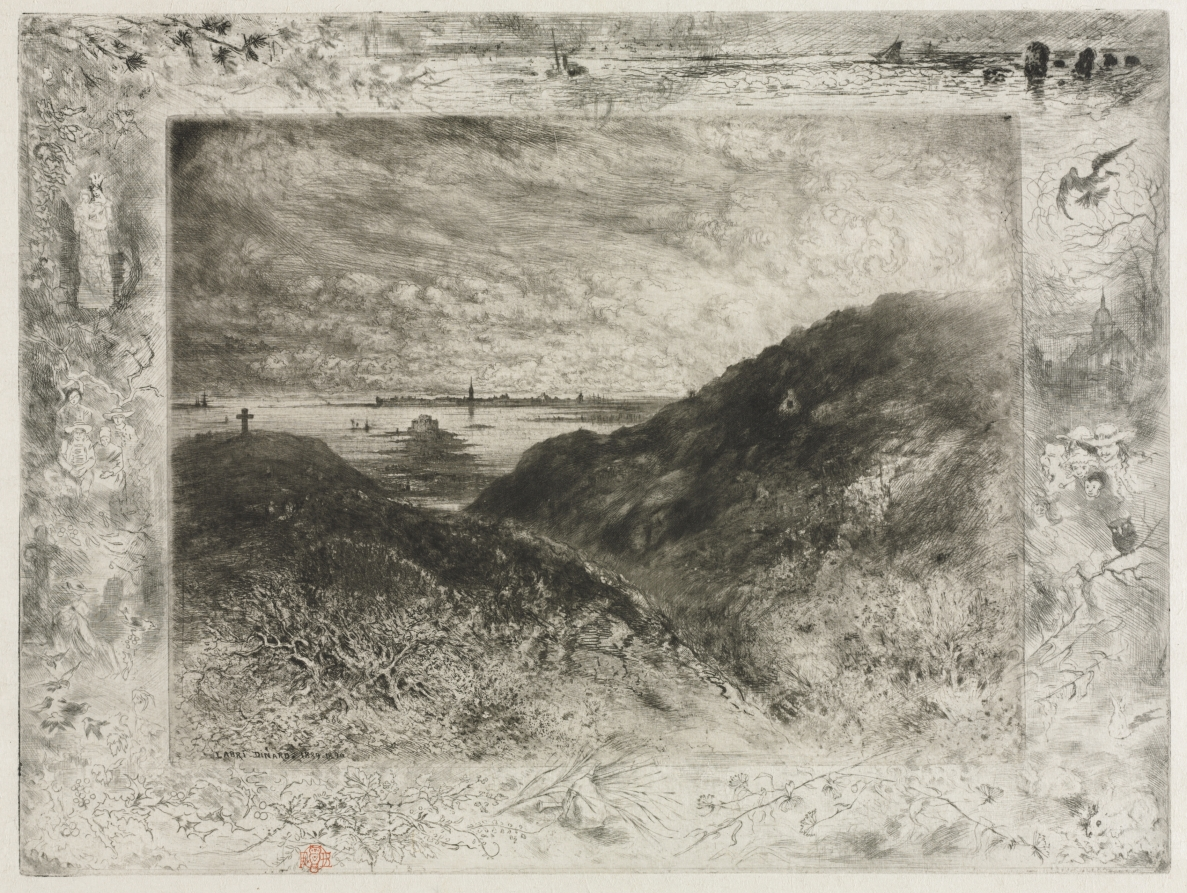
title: The Cliff, Bay of Saint Malo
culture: France, 19th century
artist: Félix Hilaire Buhot (French, 1847–1898)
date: 1886–1890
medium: etching, drypoint, aquatint and roulette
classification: Print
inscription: lower right, in plate: L'Abri-Dinard 1889-1890